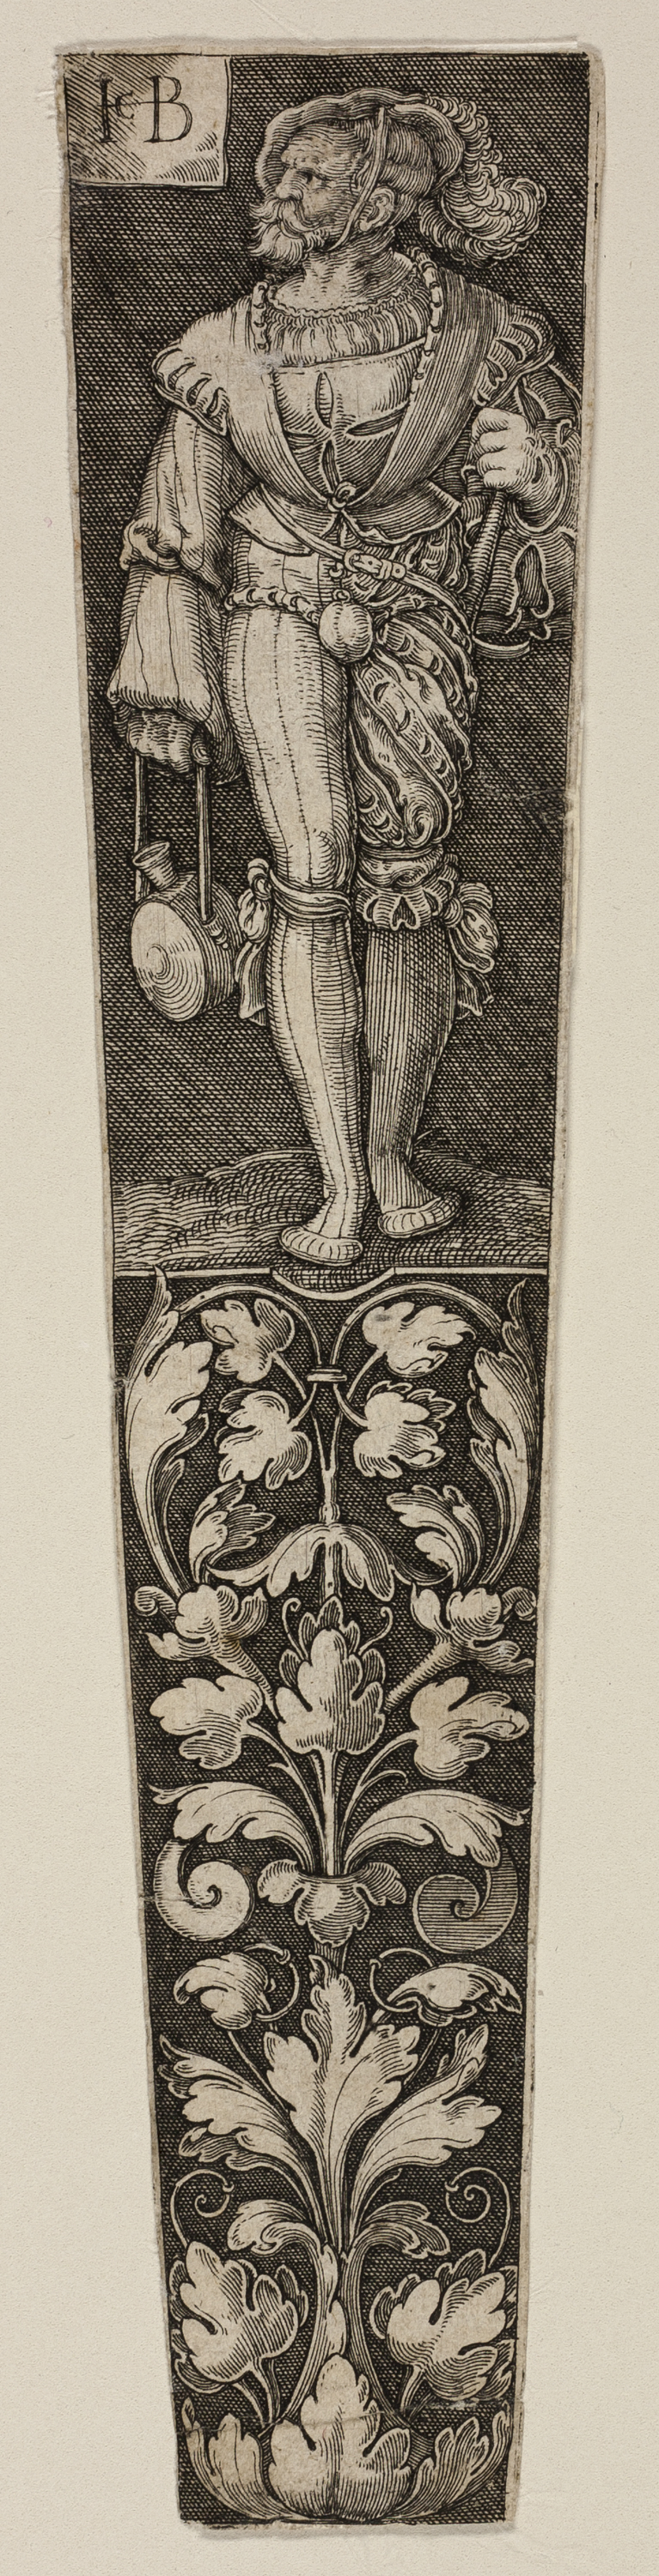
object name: Print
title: Dagger Sheath with a Landsknecht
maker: Jacob Binck (German, c.1500-1569)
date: 1568/70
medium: Engraving in black on ivory laid paper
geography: Germany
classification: engraving; print; prints and drawing